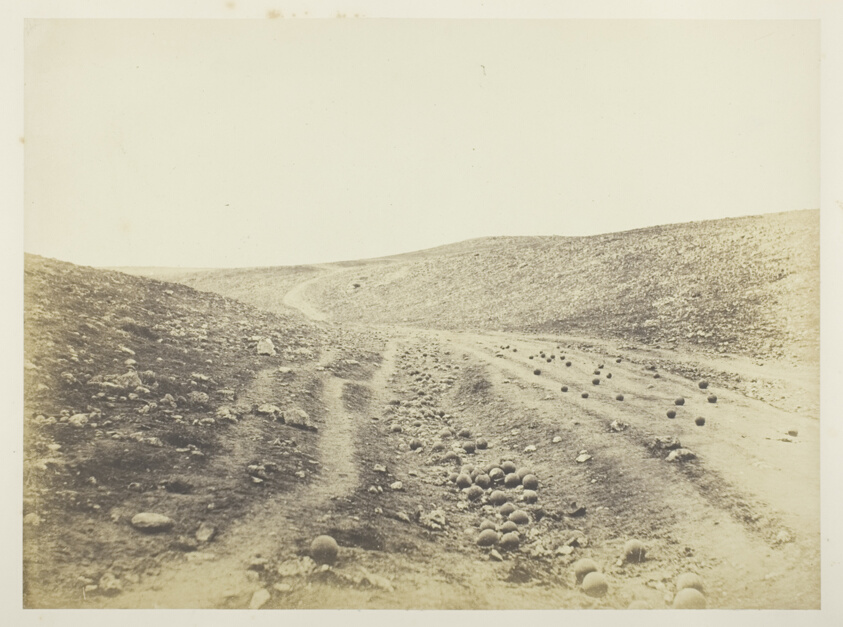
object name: Photograph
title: The Valley of the Shadow of Death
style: 19th century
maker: Roger Fenton (English, 1819–1869)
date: 1855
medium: Salted paper print, plate 8 from the album "Photographs Taken in the Crimea" (1856)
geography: England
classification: salted paper print; photographic process; photography; photograph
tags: Collected by Hugh Edwards, Crimea 1856, documentary